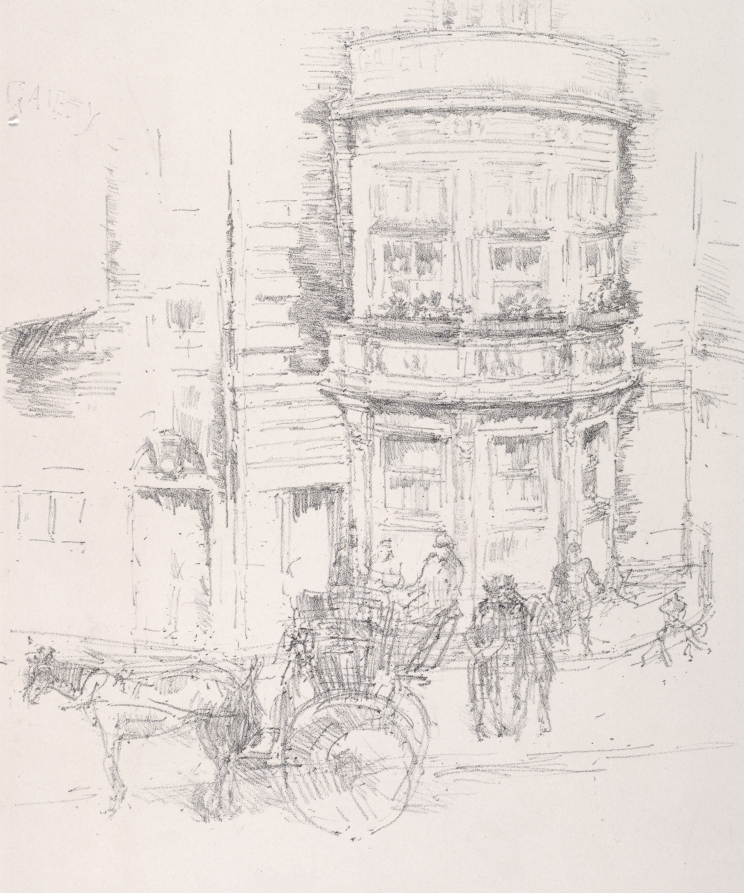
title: Back of The Gaiety Theatre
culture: America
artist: James McNeill Whistler (American, 1834–1903)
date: 1895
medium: lithograph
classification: Print